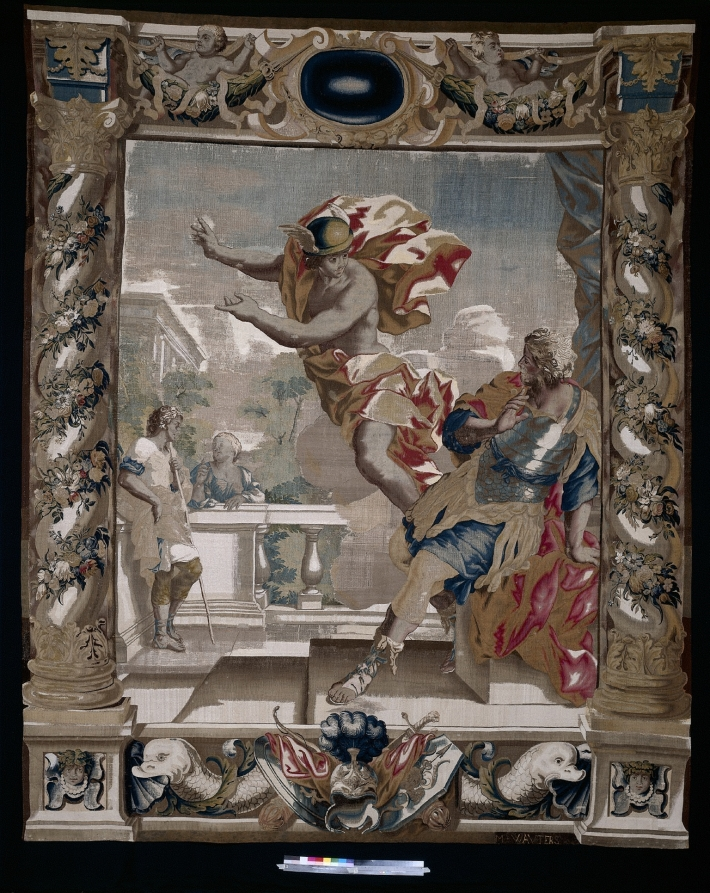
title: Mercury tells Aeneas to Leave Carthage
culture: Belgium, 17th century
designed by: Giovanni Francesco Romanelli (Italian, 1610–1662)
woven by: Michael Wauters (Flemish, 1679)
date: 1679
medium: tapestry weave: silk and wool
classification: Tapestry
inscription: signed lower right: M. Wavters.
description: The supreme god, Jupiter, sends his messenger Mercury to the Trojan hero Aeneas to urge him to continue his voyage and leave Carthage in order to fulfil his destiny, to found Rome.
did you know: This tapestry is one from a series of eight that depicts the tragic love story of Dido and Aeneas. They were gifted to the museum for display in the armor court.